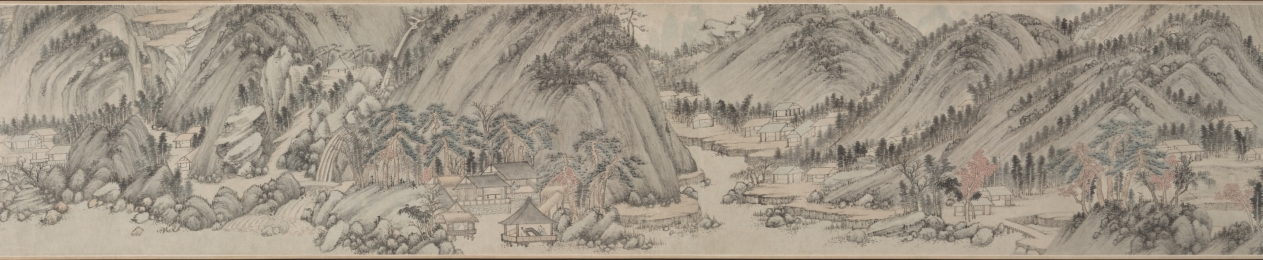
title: Mt. Taibo in the Style of Wang Meng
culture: China, Ming dynasty (1368–1644)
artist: Du Qiong (Chinese, 1396–1474)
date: 1442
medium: handscroll; ink and light color on paper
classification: Painting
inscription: Artist's inscription, signature, and 11 seals: [1 seal] Tung-yüan chai. Huang-ho-shan-ch'iao [Wang Meng] painted a painted called T'ai-po Mountain. Its brushwork is superior and admirable, which is very close to Yu-ch'en [Wang Wei, 699-759]. The cleverness of its composition, the maple groves and rustic temples, the inaccessible ravines and autumnal plateaus, the periolous peaks and strange rocks, etc., all seem to be so natural. The paper is only a little over eight feet, but the landscape has the range of a thousand miles. Once you open and note the contents, it is as if one were roaming among the mountain peaks enveloped in mist and clouds, and forgot the dusty world. When I first saw this, I was so mixed with excitement and joy that I could not take my hands off the painting. So I put it on the table, and tried my best to imitate it, forgetting sleeping and eating for about three months before it was completed. Although I do not dare to tread in the footsteps of Huang-ho shan ch'iao, I took great pains to capture his spirit in composition and colors. I do not know whether it would pass the judgment of the experts. On the fifteenth day of the fifth month, the seventh year of the Cheng-t'ung year [1442], inscribed by Tung-yüan, Tu Chiung. [2 seals] Yung-chia; Ching-chieh ming-men. [8 seals on painting] Tung-yüan chai; Ching-chieh ming-men; Yung-chia; Tu Ch'iung yin; Tung-yüan (repeated 5 times). trans. WKH/LYSL 3 colophons and 7 additional seals: 1 colophon and 2 seals of Chou Ting (1401-1487); 1 colophon and 2 seals of Wu K'uan (1435-1504); 1 colophon, dated 1655, and 2 seals of Lan Ying (1585-after 1664).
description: When a Chinese painter "imitated" a painting by a past master, the intention was never to produce an exact copy. Du Qiong, the Ming painter from Suzhou, is a case in point. The painting style of this handscroll is actually closer to that of Huang Gongwang (1269–1354) than to the style of Wang Meng (about 1301–1385). Both masters were active during the previous dynasty and are among the so-called Four Great Masters of the Yuan dynasty (1279–1368). In this painting, the interplay of styles, including Du Qiong's own, contribute to an inner dimension that is more than visual. Mt. Taibo is located in the province of Zhejiang and is known for its scenic beauty. In this scroll, however, it is not depicted literally. The image is an ideal representation of mountains in southeastern China.